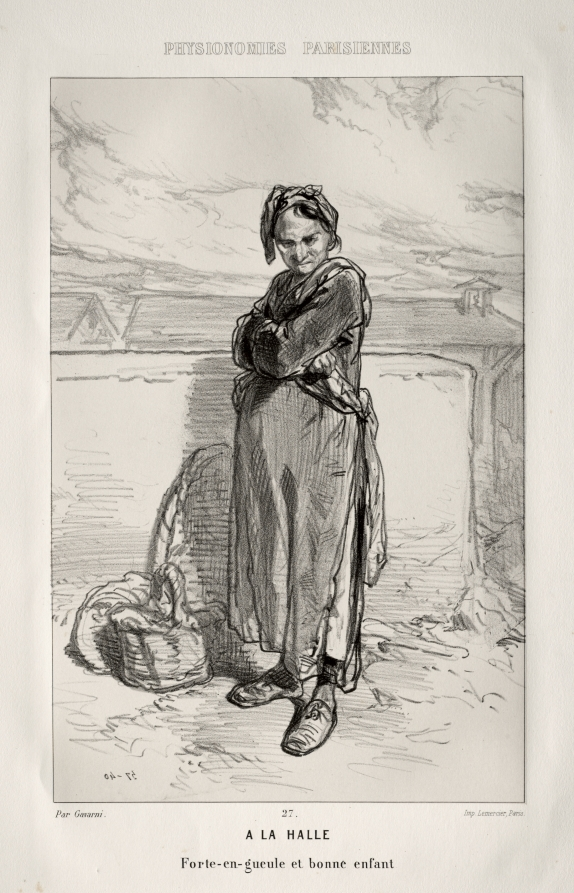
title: À la Halle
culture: France, 19th century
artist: Paul Gavarni (French, 1804–1866)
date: c. 1857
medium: lithograph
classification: Print